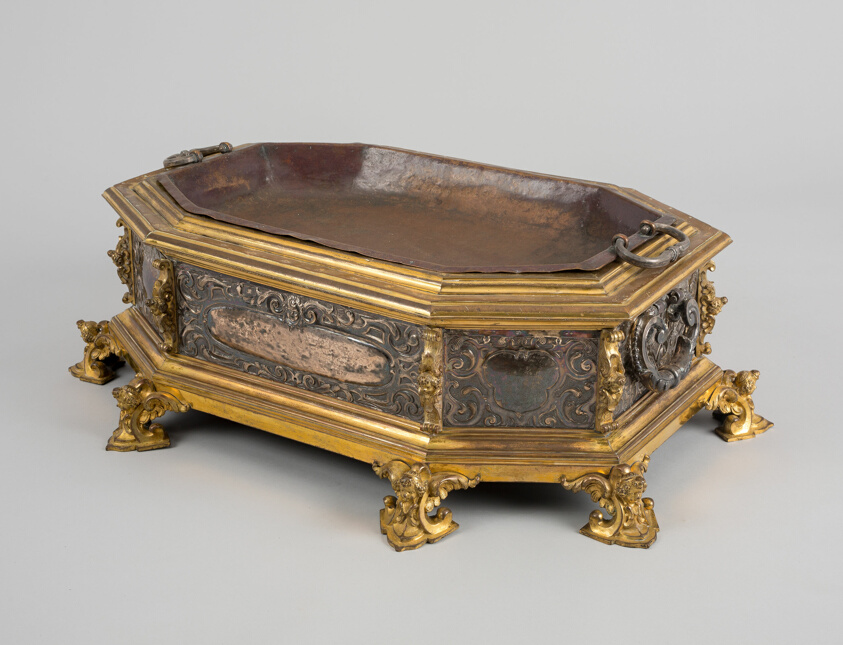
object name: Metalwork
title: Brazier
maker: Probably Florence, Italy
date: Early 17th century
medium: Wood, bronze, gilt bronze, and silvered metal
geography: Florence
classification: bronze; metalwork; european decorative arts